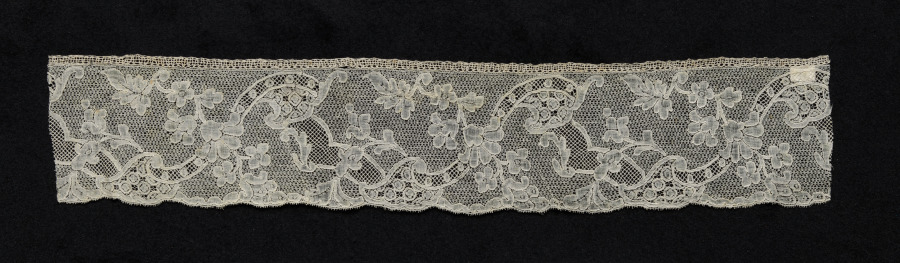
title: Lace Edging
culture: Belgium, Mechelen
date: 1700s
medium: Linen: bobbin lace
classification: Lace